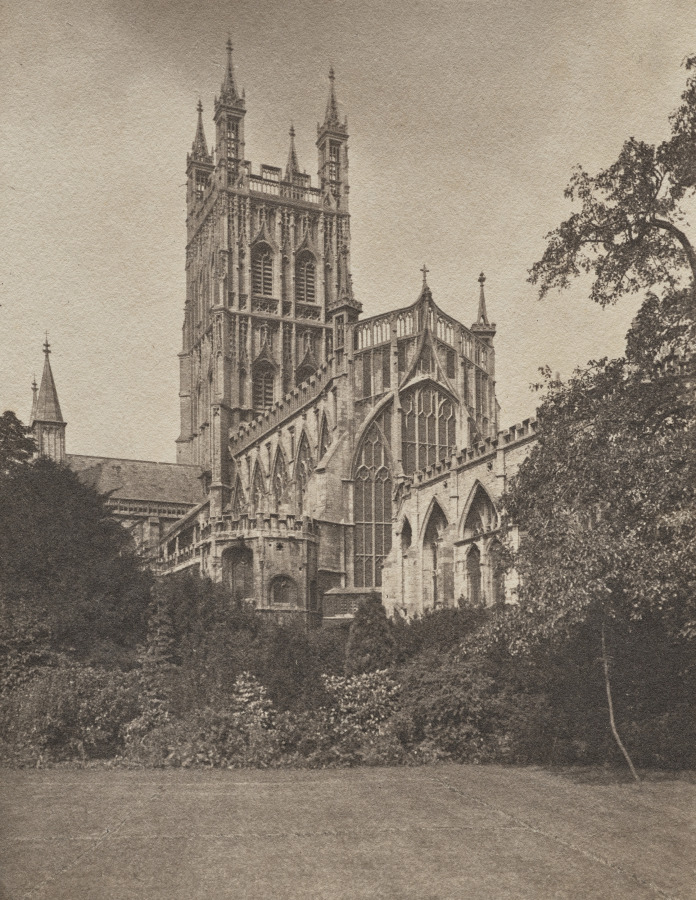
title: Gloucester Cathedral from the Southeast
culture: England, 19th century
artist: Frederick H. Evans (British, 1853–1943)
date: c. 1880s-90s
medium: platinum print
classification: Photograph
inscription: Embossed in lower right on recto of primary mount: “FHE”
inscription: Written in pencil in lower left on recto of secondary mount: “GLOUCESTER CATHEDRAL-FROM THE SOUTH EAST”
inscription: Ex-Libris label adhered to verso of secondary mount: “Ex Libris/Frederick H. Evans/Let those who/hold the torch/hand it on to/others”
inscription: Written in pencil on verso: “400.-“